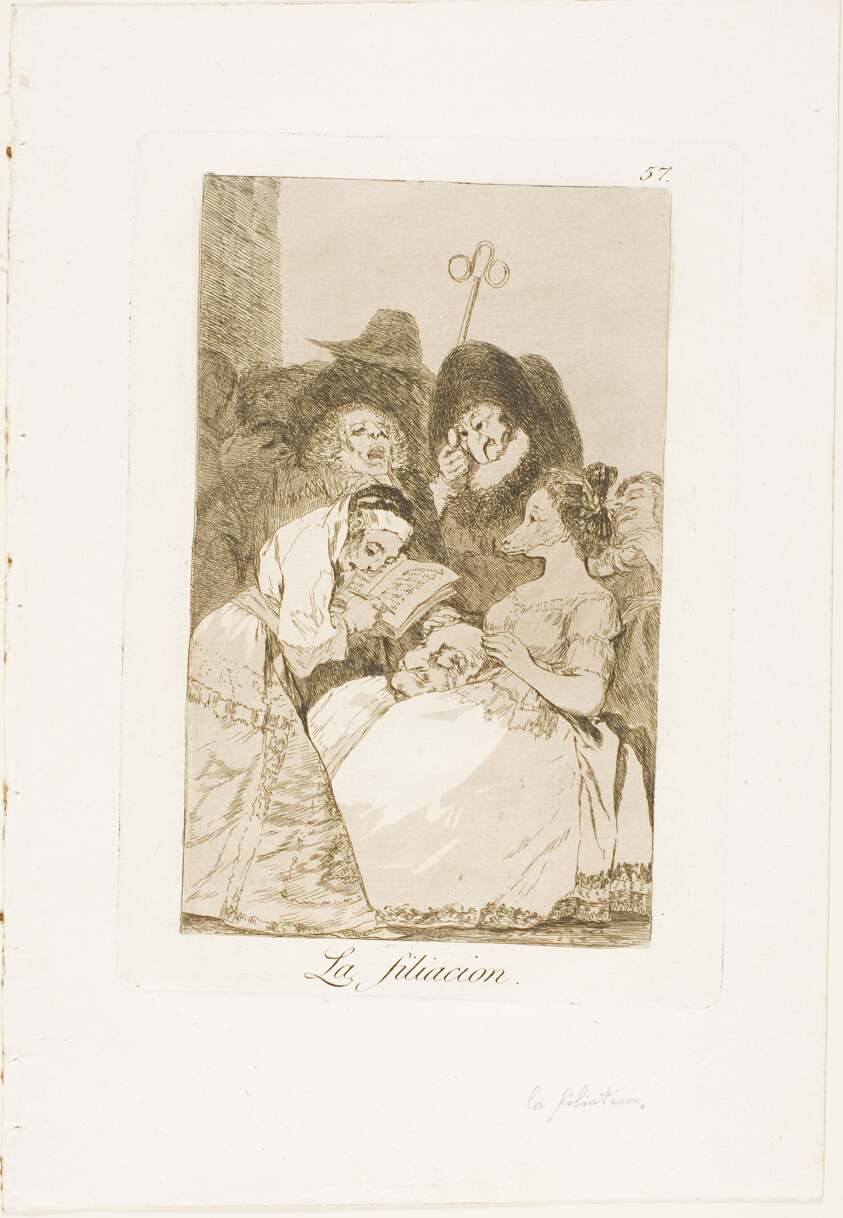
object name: Print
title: The Filiation, plate 57 from Los Caprichos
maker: Francisco José de Goya y Lucientes (Spanish, 1746-1828)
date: 1797/99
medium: Etching and aquatint on ivory laid paper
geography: Spain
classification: etching; print; prints and drawing